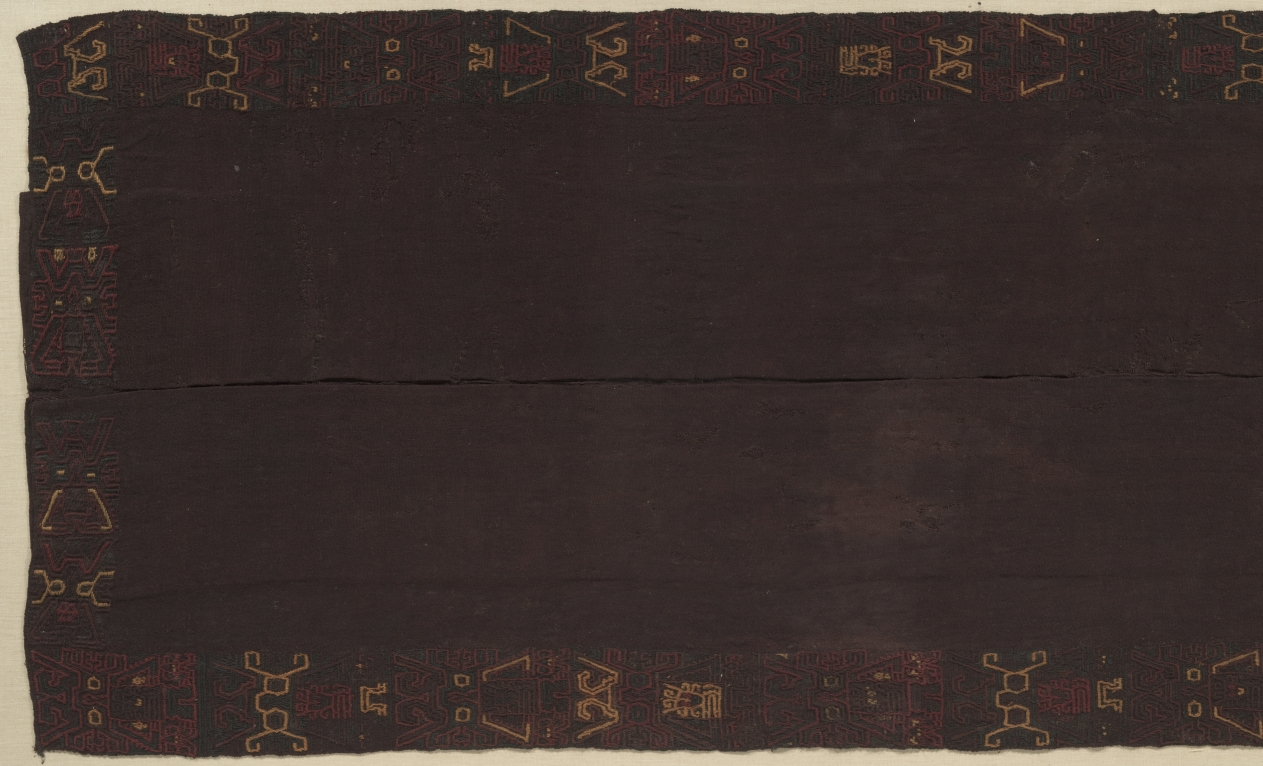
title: Mantle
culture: Peru, South Coast, Paracas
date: c. 600–400 BCE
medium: embroidery on wool ground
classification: Textile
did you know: Extremely dry conditions on Peru's desert coast allow for the extraordinary preservation of textiles.